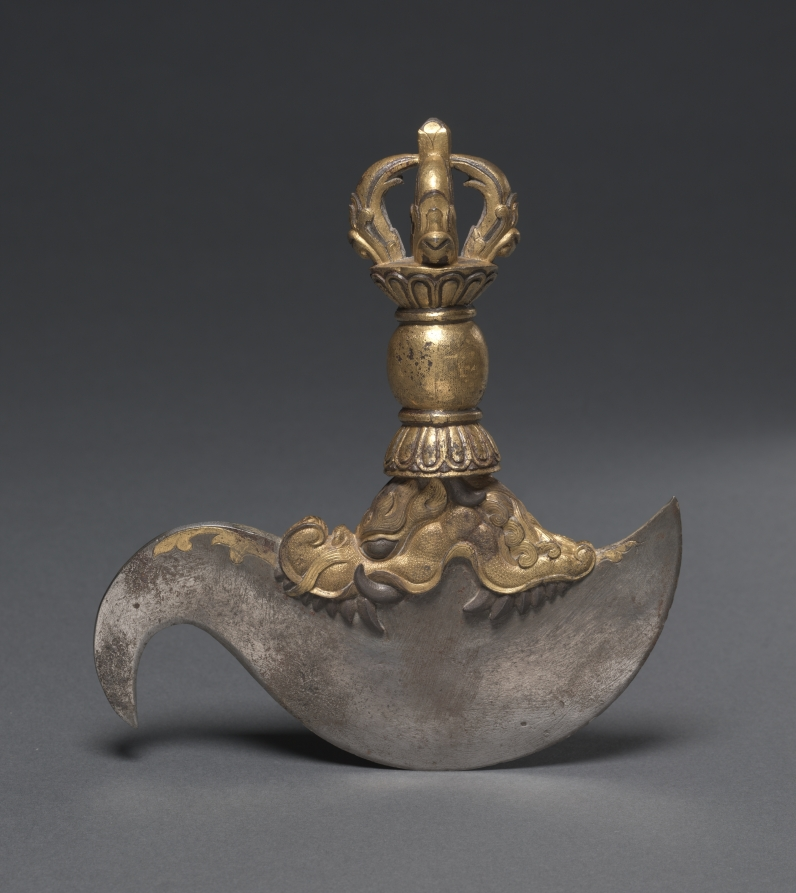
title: Ritual Flaying Knife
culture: Sino-Tibetan, Derge School, Yongle period (1403-1427)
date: c. 1407–1410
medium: iron alloy with gold and silver inlay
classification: Metalwork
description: This ritual object was gifted to a Tibetan patriarch as part of a set of tantric Buddhist art made in the imperial workshop of the Yongle emperor of the Ming dynasty, who reigned from 1403-1425.